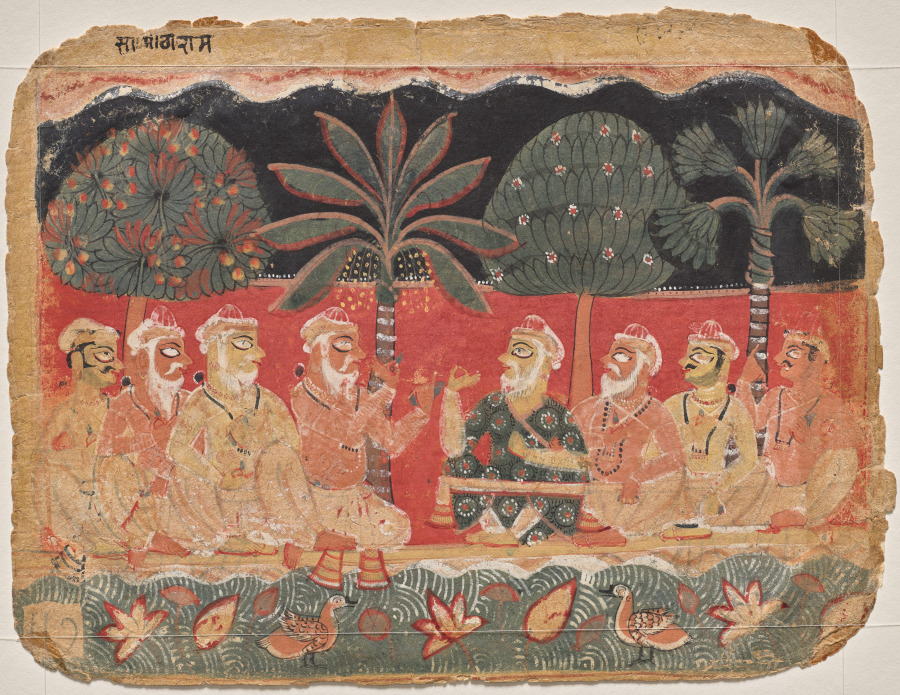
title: Nanda and the elders, page from a Bhagavata Purana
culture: Northern India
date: c. 1525–40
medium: Gum tempera and ink on paper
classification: Painting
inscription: [[recto, upper left corner]] Sa. Mitharama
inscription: [[recto, upper right corner, badly faded]] Hlrabai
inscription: [[verso, upper left corner]] 48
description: In a page from a manuscript about the life of the Hindu god Krishna, Krishna’s foster father, wearing green, confers about moving their community to a new location. Their current village has been beset by demons sent by the evil king to kill Krishna. Typical of South Asian compositions of the early 1500s, figures and other elements are arranged in horizontal rows. Above, in the story of an encounter between a gardener and a merchant’s daughter who wants a rose, we see use of the same Mughal convention, shown with a more natural conceptualization of space. Mughal compositions were often based on earlier illustrations.